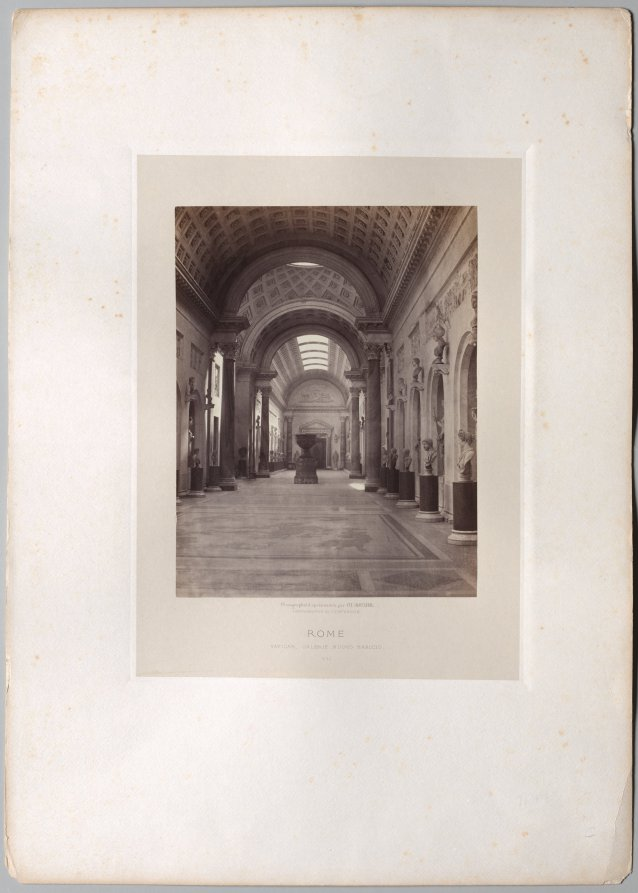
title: Vatican: Galerie Nuovo Braccio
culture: France, 19th century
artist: Charles Soulier (French, 1840–1875)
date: c. 1860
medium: albumen print from a collodion negative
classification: Photograph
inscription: Imprinted on primary mount: "Photographié après nature par CH. SOULIER/PHOTOGRAPHE de L'EMPEREUR./ROME/VATICAN.GALERIE NUOVO. BRACCIO./442" Written in pencil on verso of mount: "67" "IT-21" Partially erased pencil on recto of mount: "(760) c"